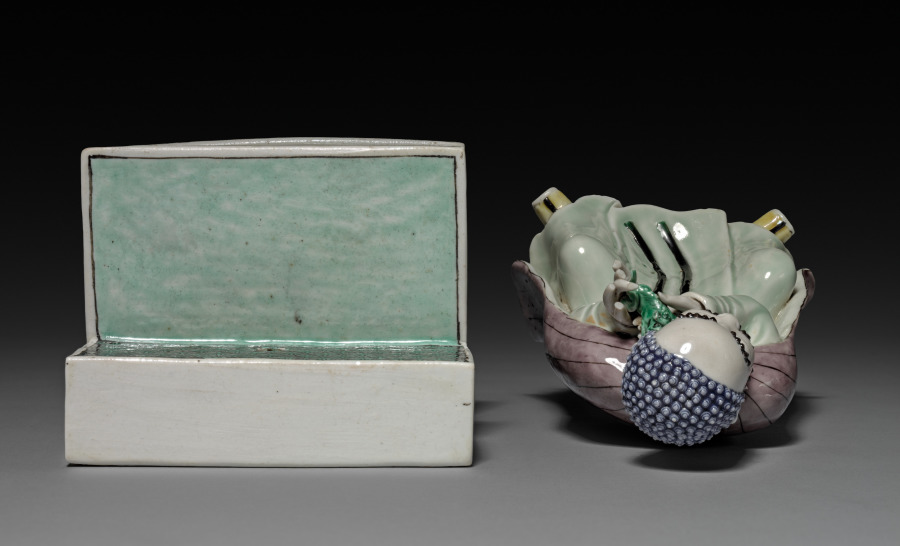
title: Lohan (Arhat) Holding a Fu Dog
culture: China, Jiangxi province, Jingdezhen kilns, Qing dynasty (1644-1911), Kangxi reign (1662-1722)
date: 1662–1722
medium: porcelain with famille verte overglaze enamel decoration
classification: Ceramic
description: Lohan are disciples of Buddha with supernatural powers and eccentric behaviors. This lohan is holding the fu-dog, symbolizing good luck, while its mate is holding the peach of longevity (shoutao). With carefree smiles and playful gestures, these two figures embody a humorous attitude and a detachment from worldly affairs. This pair of porcelain figures was perhaps part of a house altar set or a decorative item in a household.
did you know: This lohan and its pair embody a humorous attitude and playful behavior, indifference to danger and miracles, and hence a detachment from worldly affairs.